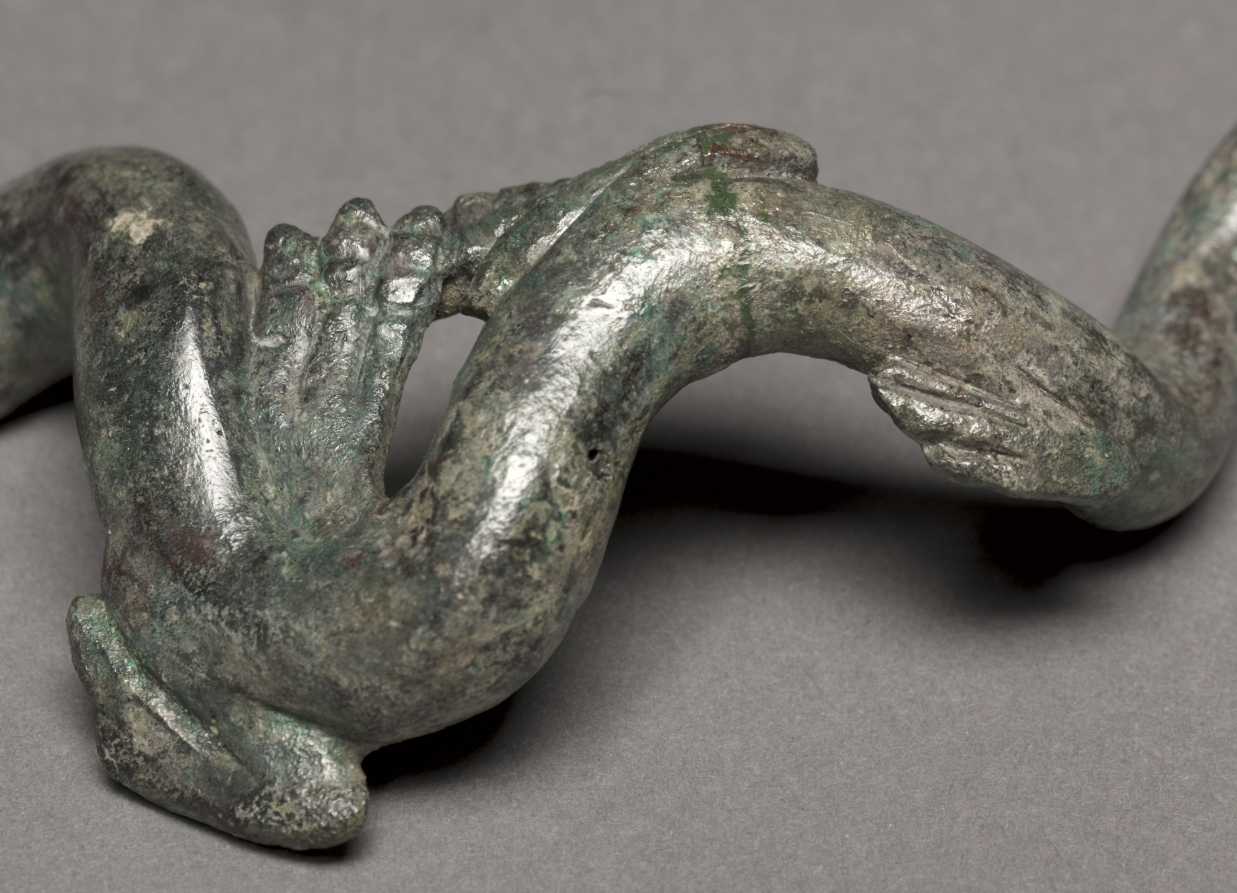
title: Detached Creature from the Cleveland Apollo: Apollo Sauroktonos (Lizard-Slayer) or Apollo the Python-Slayer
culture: Greece, Athens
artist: attributed to Praxiteles (Greek, Athenian, c. 400–330 BCE)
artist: or Follower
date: c. 350–200 BCE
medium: bronze, copper and stone inlay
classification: Sculpture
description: Both snakelike and lizardlike in appearance, the creature has a scaly head and four small feet. These are attached asymmetrically to its long and sinuous body, some with carefully delineated toes, others less detailed. The smallest foot falls behind a line bisecting the creature, where radiography shows a pin joining two separately cast sections. Although the bronze of the front and back halves is quite similar, the front half shows greater porosity (air bubbles). Perhaps the original back half was damaged during casting, necessitating a new or re-casting of that portion of the creature, with a smaller, relocated fourth leg.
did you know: Despite its small size, the creature was cast in two solid parts.